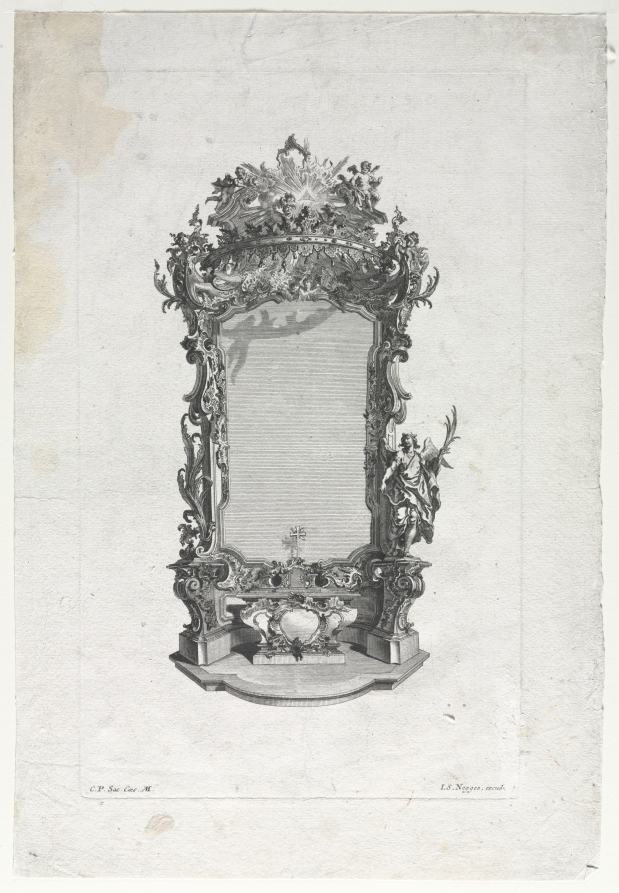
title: Model for Altar for Woodcarvers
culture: Germany, 18th century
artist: Gottfried Bernhard Götz (German, 1708–1774)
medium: engraving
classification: Print